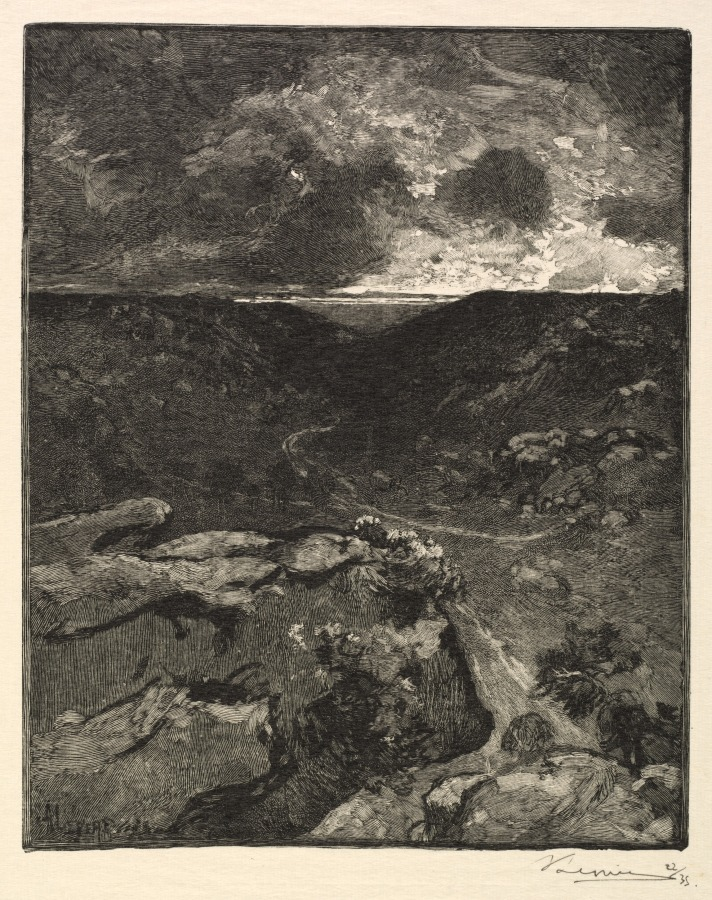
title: Fontainebleau Forest: Franchard Valley (La Forêt de Fontainebleau: La Vallée de Franchard)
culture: France, 19th century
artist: Auguste Louis Lepère (French, 1849–1918)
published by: A. Desmoulins, Published in Revue Illustrée, 1887–90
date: 1890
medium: wood engraving from bound volume of 34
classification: Bound Volume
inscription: In block, lower left: A. LEPÈRE; below image, lower right, in black ink: ALepère 22/35; on window mat, lower right, in graphite: La vallée de Franchard